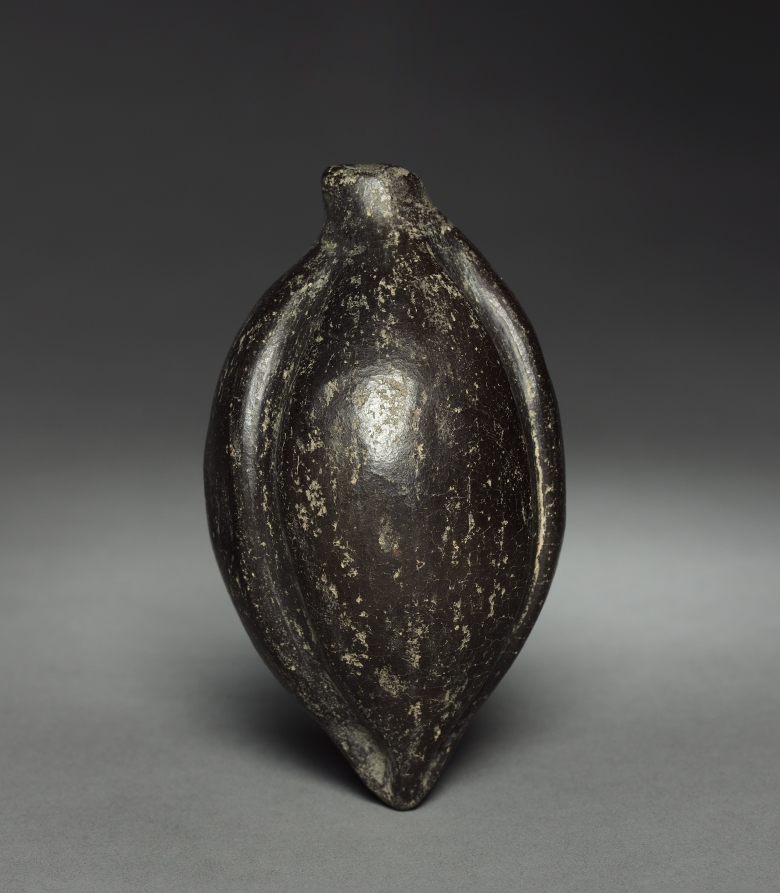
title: Fruit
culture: Colombia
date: before 1921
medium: pottery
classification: Ceramic